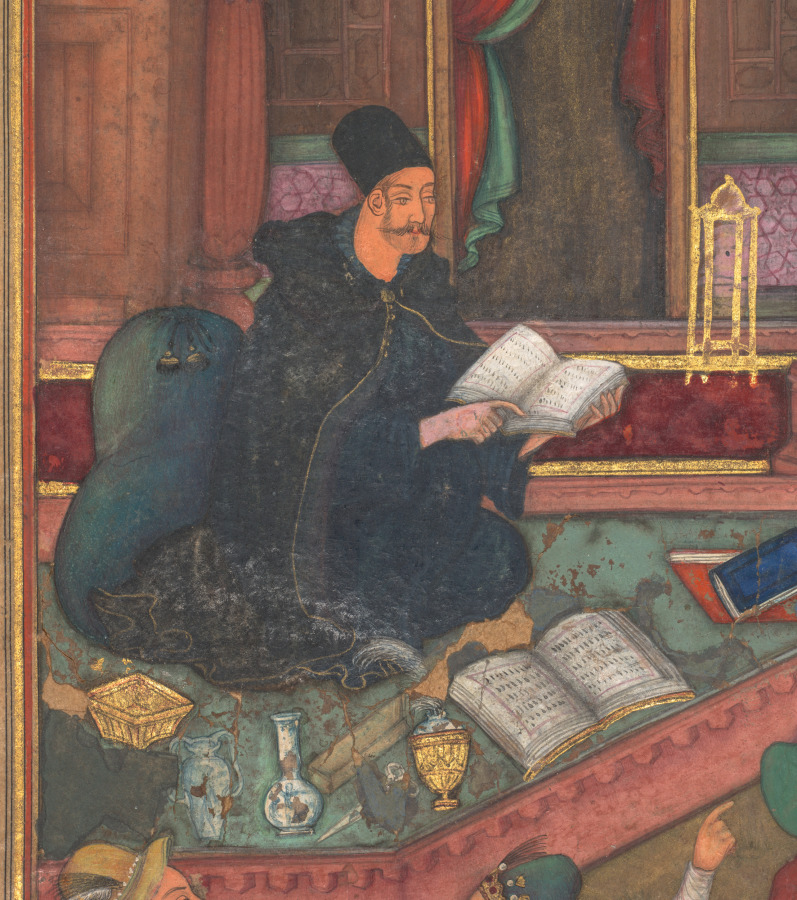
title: John the Baptist recognizes Christ by the appearance of a dove (folio 50 verso), from a Mirror of Holiness (Mir’at al-quds) of Father Jerome Xavier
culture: Mughal India, Allahabad, made for Prince Salim (1569–1627)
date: 1602–4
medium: Gum tempera, ink, and gold on paper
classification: Manuscript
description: Wearing the black robes and cap of a Jesuit priest, John the Baptist sits in a well-appointed Mughal-style courtyard. According to Father Jerome’s text, John recognizes Jesus by the dove who sits on his head. Possibly Father Jerome intended to relate the Gospel account that describes the dove of the Holy Spirit as hovering in the air above his head. The artist’s own reactions to this passage may be reflected in the expressions and gestures of the onlookers, who seem incredulous and bemused at this sign.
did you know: Jesus holds a rosary with a cross even in scenes prior to his crucifixion.